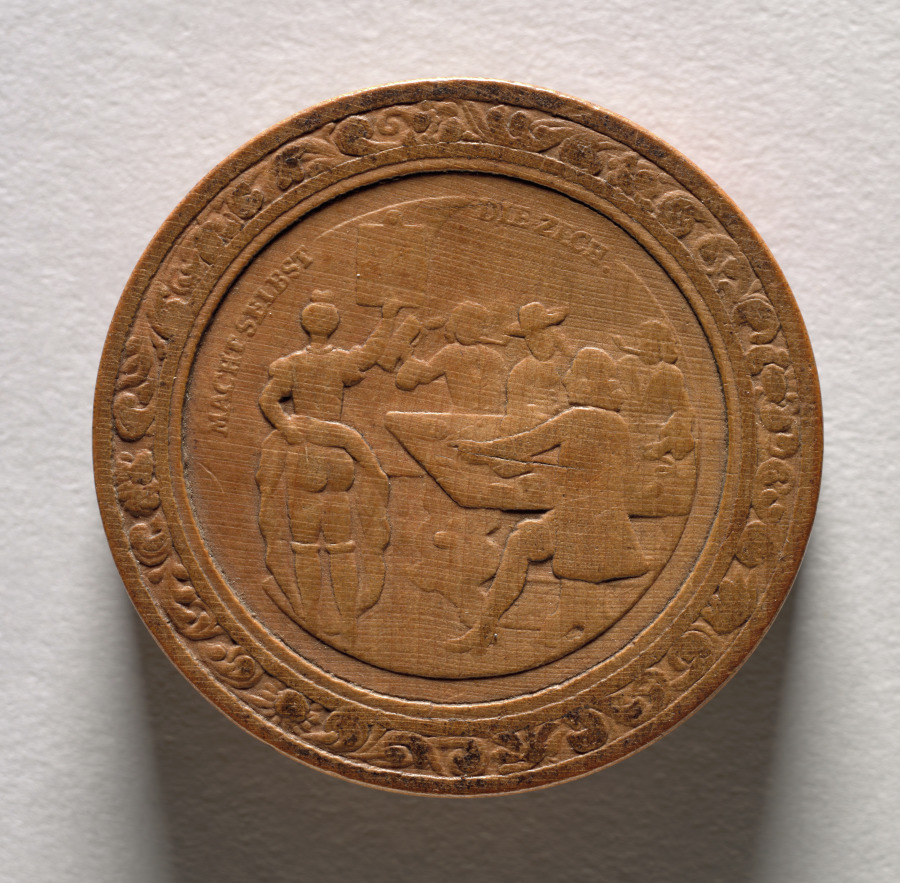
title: Gaming Piece (obverse)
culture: Germany, late 17th-early 18th Century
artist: Martin Brunner (German, 1659–1725)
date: c.1700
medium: wood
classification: Furniture and woodwork